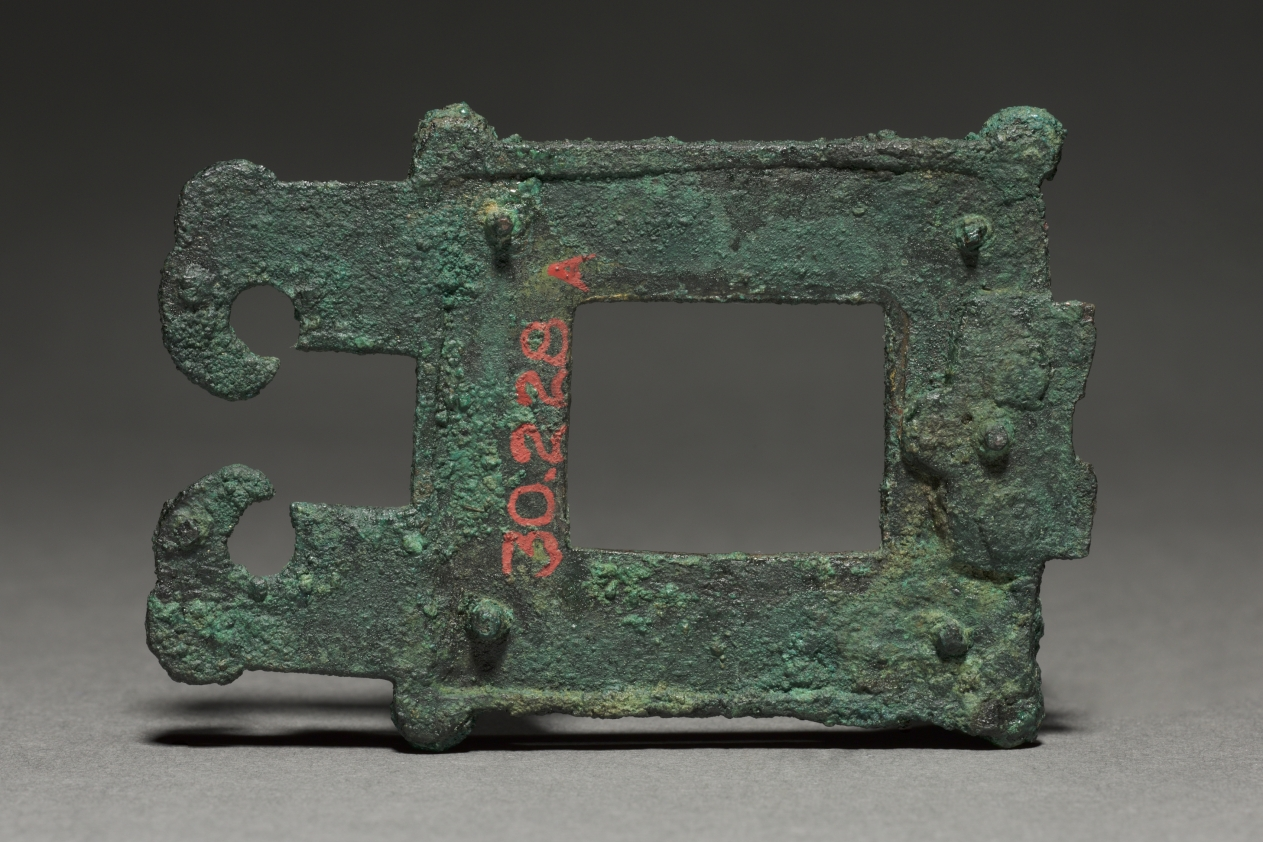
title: Buckle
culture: Ostrogothic, Migration period, 6th century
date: 500s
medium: bronze and garnets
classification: Jewelry